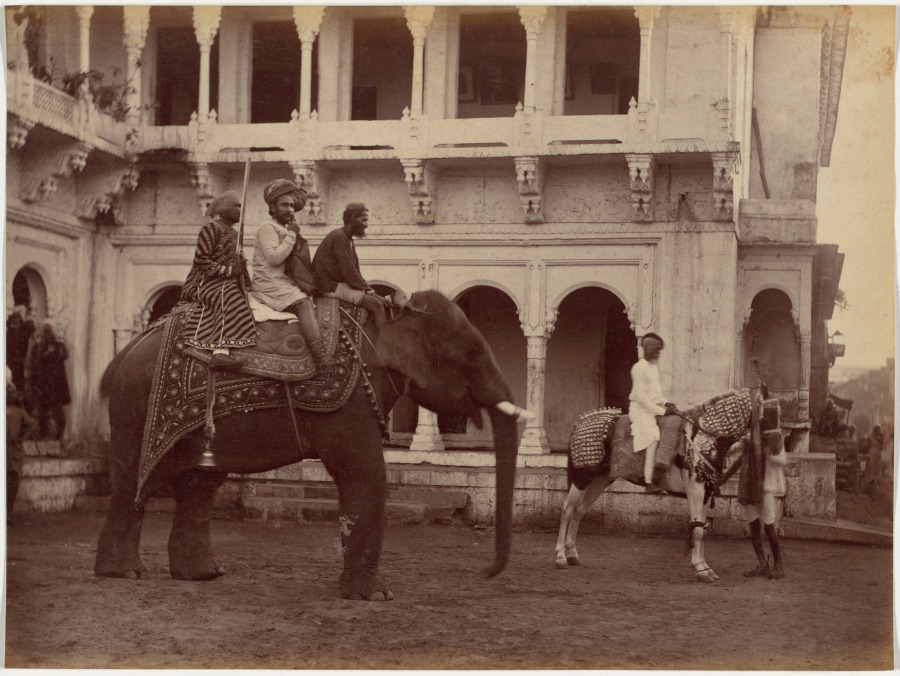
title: Ramkishore Singh of Rewa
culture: India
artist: Raja Deen Dayal (Indian, 1844–1905)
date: 1886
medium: albumen print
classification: Photograph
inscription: Imprinted in black ink on verso: “24.6L”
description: Ramkishore Singh, likely a high-ranking official or merchant, is depicted twice in the album, each time aboard a luxurious type of transport. In one photograph, he rides atop an elephant, a creature associated with India, power, and fortitude, preceded by an attendant on horseback. In the other, he rides in a European-style carriage pulled by two horses, flanked by attendants on camels (native to parts of India) and horses. Like the images of Britons in their carriages and rickshaws, these depictions suggest the sitter’s wealth through his possession of servants, animals, and vehicles.